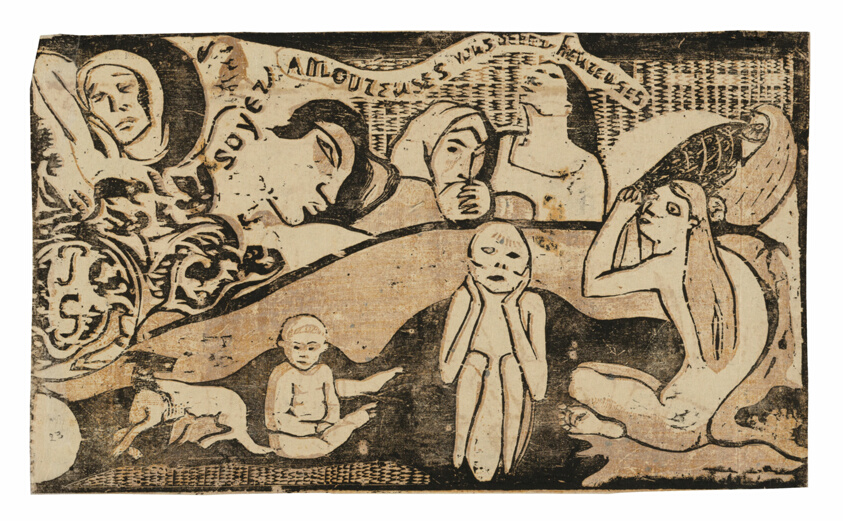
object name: Print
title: Soyez amoureuses, vous serez heureuses (Love, and You Will Be Happy), from the Suite of Late Wood-Block Prints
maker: Paul Gauguin (French, 1848-1903)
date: 1899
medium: Second-state impression laid down on first-state impression Wood-block print of second state in black ink on thin ivory Japanese paper, laid down on wood-block print of first state in yellow ocher ink with traces of black ink on grayish-ivory wove paper (recto); wood-block print in black and yellow ocher ink and oxidized linseed oil (est.) on grayish-ivory wove paper (partial offset impression of the second state) (verso)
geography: France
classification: woodcut; print; prints and drawing